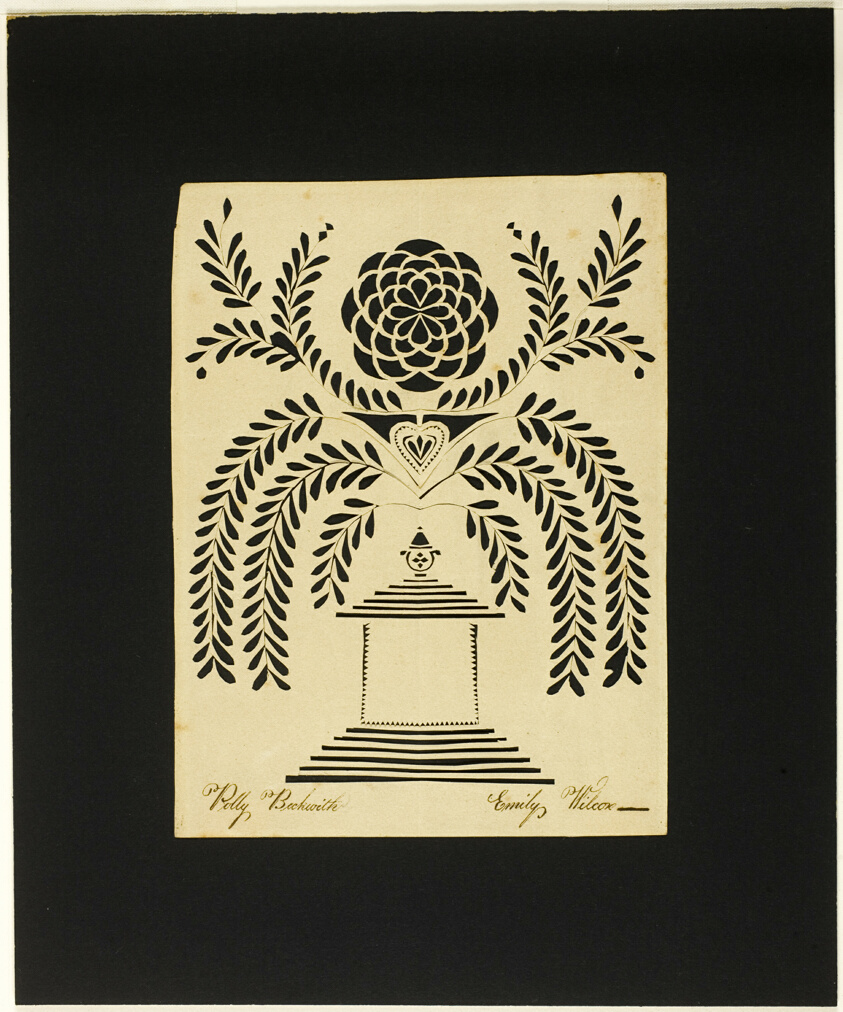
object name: Drawing and Watercolor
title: A Condolence Card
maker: Emily Wilcox (American, 19th century)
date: c. 1830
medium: Paper cutout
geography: United States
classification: stencil; prints and drawing; paper; drawings (visual works)